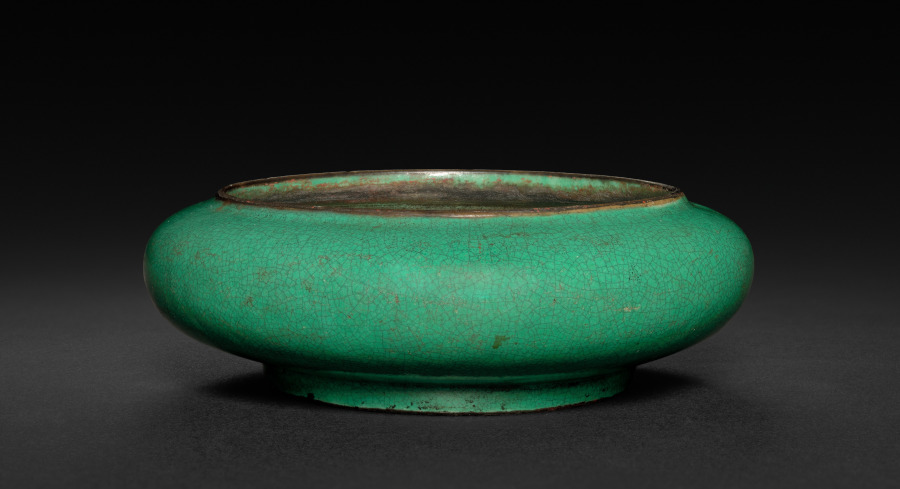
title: Flattened Globular Bowl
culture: China, Qing dynasty (1644-1911), Kangxi reign (1661-1722)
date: 1661–1722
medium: porcelain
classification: Ceramic